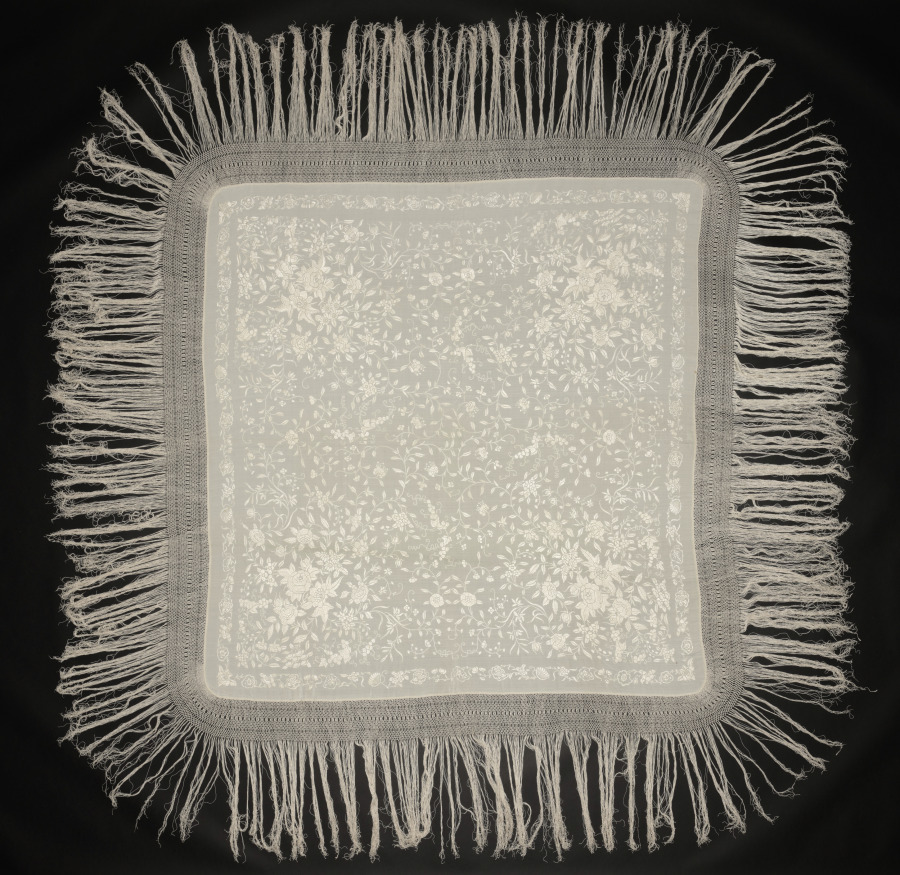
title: Silk Shawl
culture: China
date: 1800s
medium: embroidery, silk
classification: Embroidery